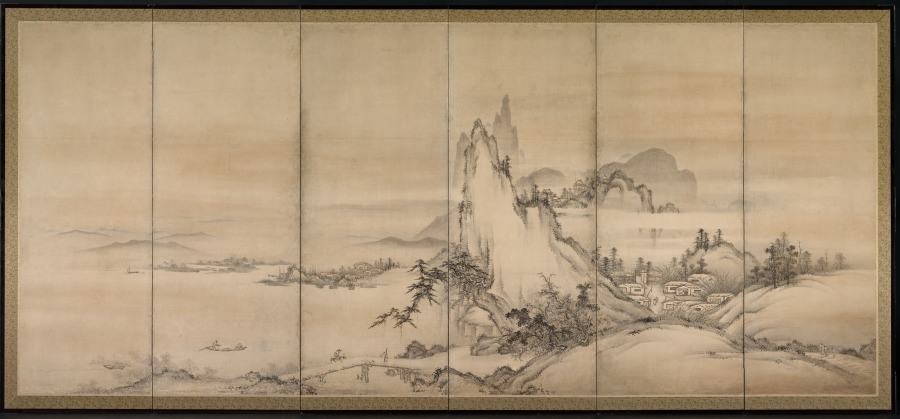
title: Chinese Landscape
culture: Japan, Muromachi period (1392–1573)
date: 1500s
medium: One of a pair of six-fold screens; ink and slight color on paper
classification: Painting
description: In a panorama of mountains and expanses of water, three gentlemen have assembled by moonlight to enjoy one another’s company away from a bustling village. An influx of ink paintings from China in both album and scroll formats beginning in the late 1200s inspired Japanese artists to create landscapes based upon Chinese prototypes. Later, Japanese painters adapted the imagery to the larger format of folding screens, which were used to define spaces in large rooms.